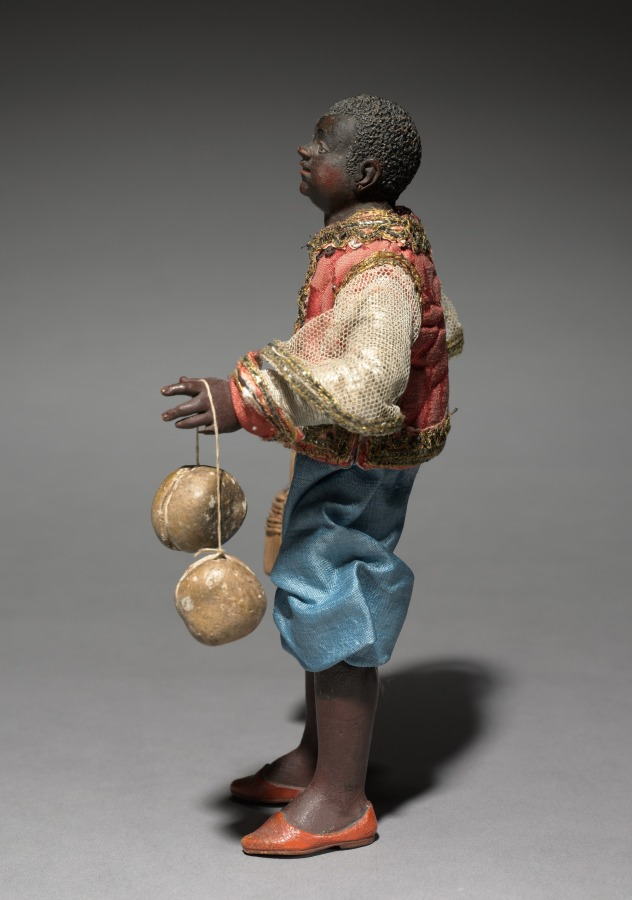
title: Figure from a Crèche: Attendant of the Magi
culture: Italy, Naples, late 18th-early 19th century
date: 1780–1830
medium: painted wood and terracotta with various textiles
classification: Sculpture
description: The practice of creating scenes of the Nativity for the home dates from the early 1700s in Italy, where people began to set up doll-like figures of about a foot or less in height. The custom was particularly popular in Naples around 1800, where crèche scenes (crèche means cradle, or crib) included many figures, whose heads and hands of painted terracotta, stuffed cloth bodies, and clothing adapted from contemporary local costumes gave them an amazingly realistic character. Representations of the birth of Jesus can be traced to the first few centuries of Christianity. Both living creatures and sculptural depictions of them were used from early times. By the late middle ages it was customary to create life-size figures of wood or stone, naturalistically painted, to represent the characters who participated in the events of Jesus's early life. These sculptures were then arranged in scenes illustrating one or both of the most important of these events, the Adoration of the Shepherds and the Adoration of the Magi-the three kings from the East who came to pay homage to the Christ child. Used in churches, these large figures were especially popular in Italy, Central Europe, Spain, and Portugal. This Object in Focus presentation was organized by Henry Hawley, Curator of Renaissance and Later Decorative Arts and Sculpture.